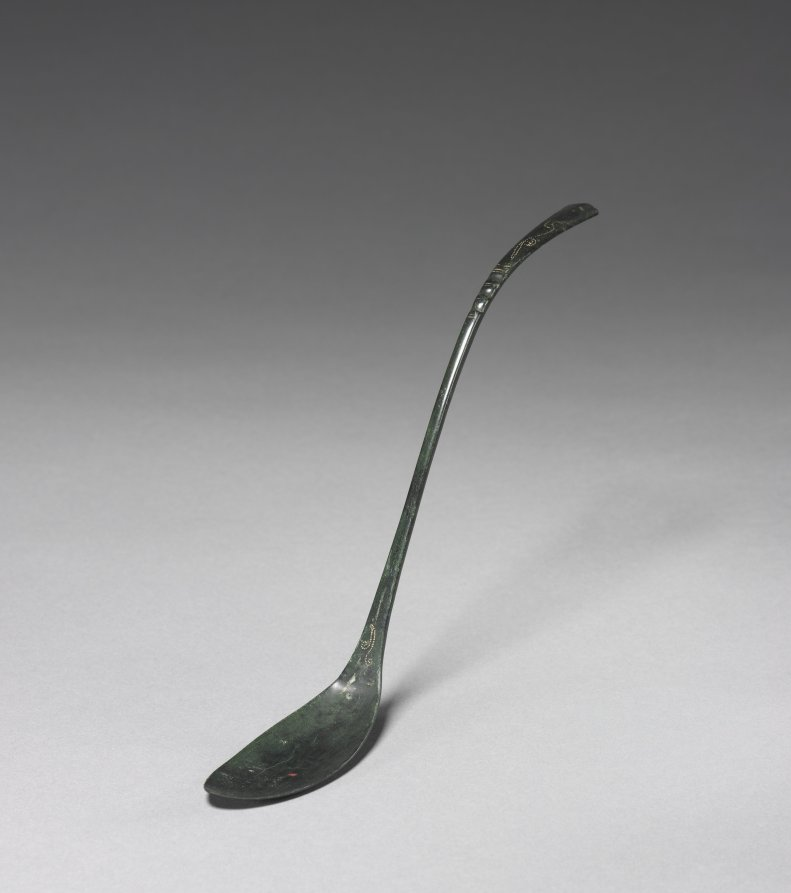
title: Spoon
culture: Korea, Goryeo dynasty (918–1392)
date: 918–1392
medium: bronze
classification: Metalwork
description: Celadons, spoons, seals, and bronze mirrors were the most common burial objects in tombs during the Goryeo period (918–1392). Furnishing tombs with an elaborate assemblage of objects was believed to honor and comfort the newly dead. Generally, Goryeo tombs were left untouched until the late 1800s. During the colonial period (1910–45), however, Japanese archaeologists hastily excavated the tombs located in Kaeseong, the former capital of the Goryeo period. Scholars recently have proposed that toward the end of the 14th century, Koreans enjoyed meat-based soups more than any other dishes, explaining why many more spoons than chopsticks were buried in tombs.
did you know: Bronze spoons are the most common burial items. Scholars have proposed that toward the end of the 1300s, Koreans enjoyed meat-based soups more than any other dishes, explaining why spoons became common household items as well as burial goods.